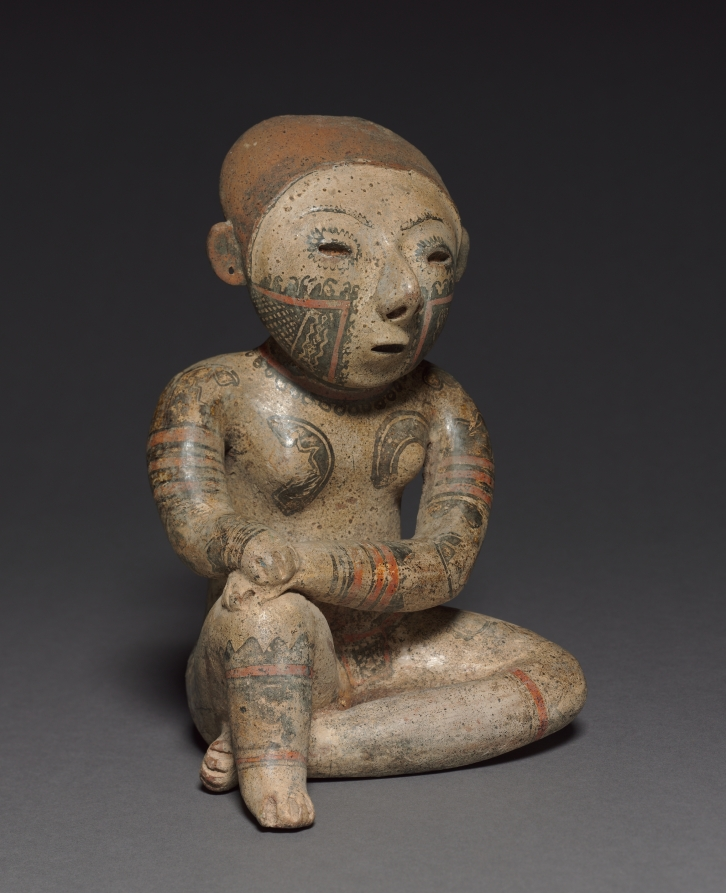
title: Seated Female Figure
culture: Mexico, Nayarit, Chinesco Style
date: c. 100 BCE–300 CE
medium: earthenware with burnished, colored slips and resist patterning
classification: Sculpture